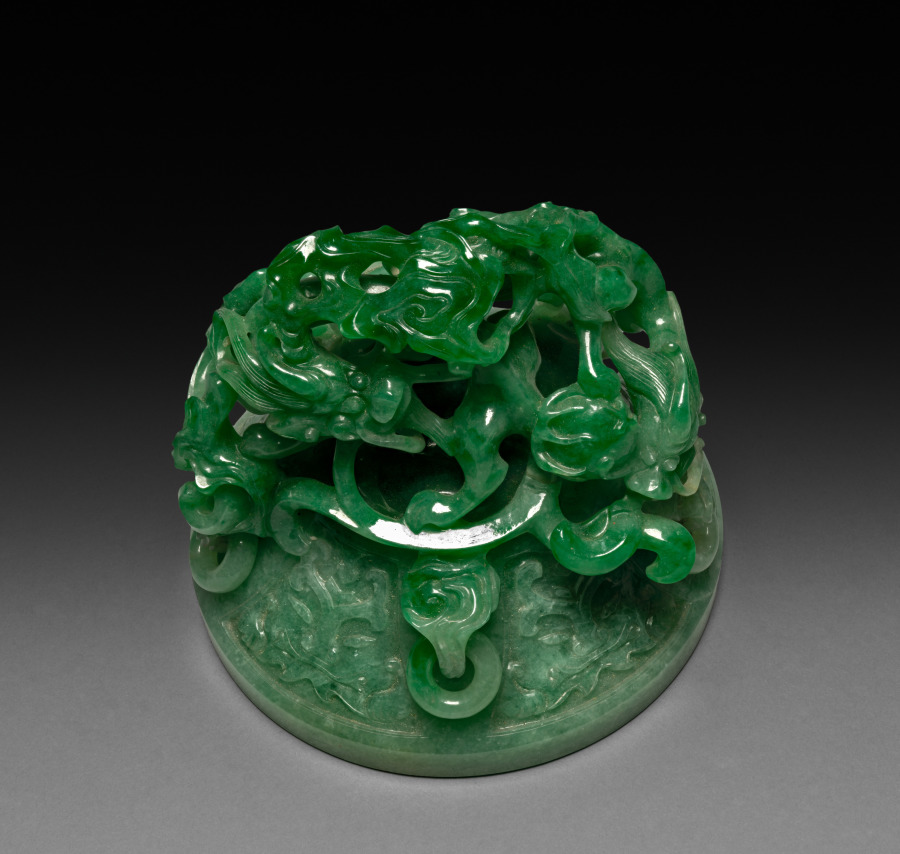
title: Three-Sectional Altar Group: Koro (lid)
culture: China, Qing dynasty (1644-1911)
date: 1644–1911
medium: jade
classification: Jade